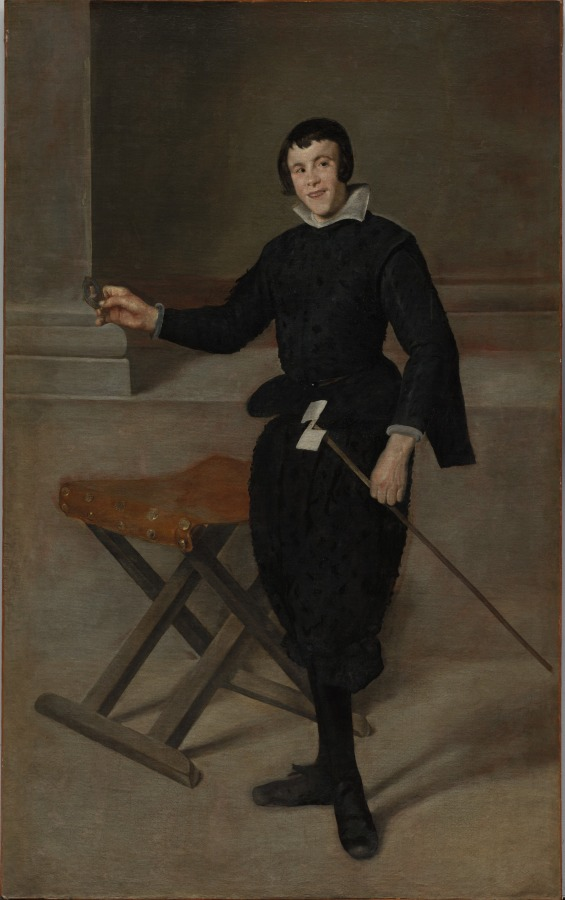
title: Portrait of the Jester Calabazas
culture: Spain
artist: Diego Velázquez (Spanish, 1599–1660)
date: c. 1631–32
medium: oil on canvas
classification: Painting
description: Calabazas, a jester in the court of King Philip IV of Spain, had physical and mental disabilities, a state that the artist emphasizes, rather than tries to hide. While the Spanish court prized and doted upon people with disabilities such as Calabazas, Velázquez transformed their depiction in portraiture. This startling work uses the format of the formal, full-length court portrait to present a type of person who was generally perceived as marginal at this point in history and profoundly humanizes him.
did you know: Calabazas holds a wind-driven pinwheel and a miniature portrait of a woman, together suggesting the inconstancy of love.